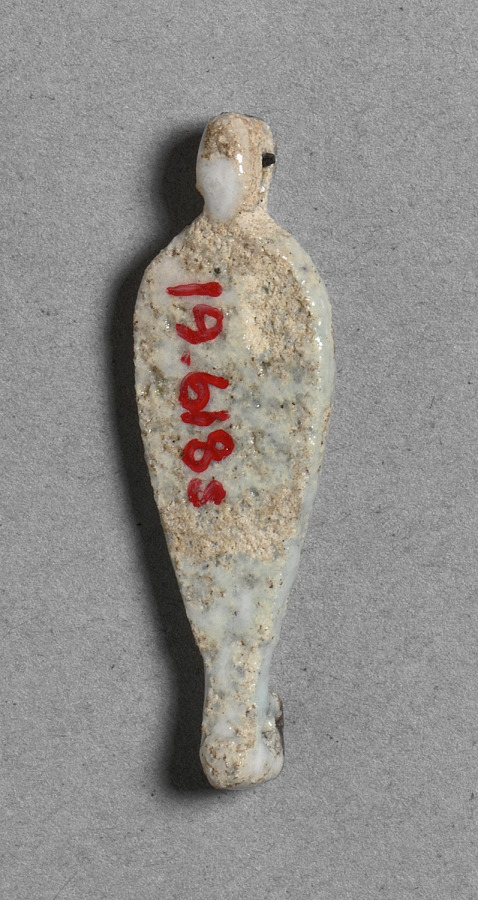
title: Petal-Shaped Bead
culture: Egypt, New Kingdom (1540–1069 BCE), Dynasty 18, reign of Amenhotep III (1390–1352 BCE)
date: c. 1391–1353 BCE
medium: faience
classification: Jewelry